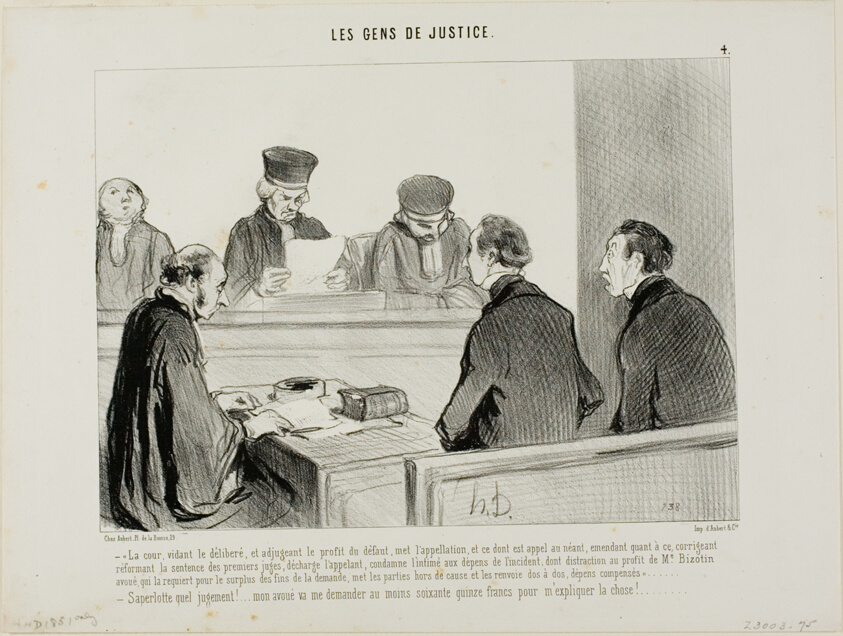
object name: Print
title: “- The Court, having weighed the evidence and apportioned the advantage accruing from the dereliction, abrogates the appeal and all similar procedures, discharges the appellant and amends the judgement of the lower Court in respect to the costs of th respondent, with the exception of a forfeiture payment to Advocate Bizotin in respect of the final judgement, and hereby dismisses both parties as aforementioned. - My God, what a verdict..... my lawyer will ask for at least seventy five francs to explain this to me.....,” plate 4 from Les Gens De Justice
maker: Honoré Victorin Daumier; French, 1808-1879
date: 1845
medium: Lithograph in black on white wove paper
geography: France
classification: lithograph; print; prints and drawing